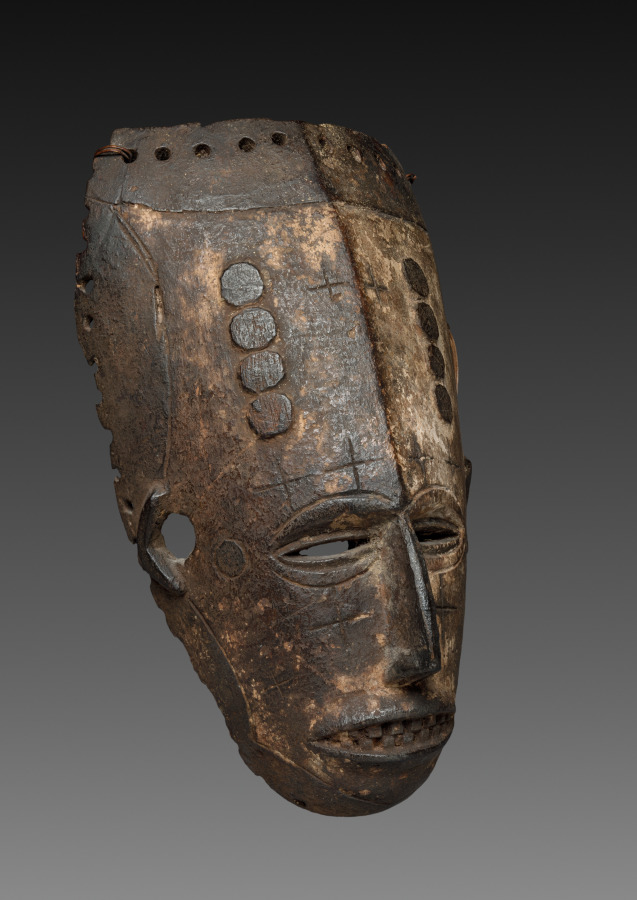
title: Face Mask (Agboho mmuo)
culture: Africa, West Africa, Nigeria, Igbo-style maker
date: possibly early 1900s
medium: Wood, pigment, plant fiber, and cotton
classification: Mask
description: This small face mask would have been complemented by a separate, elaborate superstructure covered with cotton cloth. Though always worn by a man, the image glorifies youthful female beauty. Derived from chalky clay, the white coloration of the face refers to ancestral spirits whose powers the mask evokes. The masks dance in festivals that generally celebrate the dead but also appear at funerals to escort the deceased to the land of the ancestors.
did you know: Though always worn by a man, the imagery of this mask celebrates youthful female beauty.